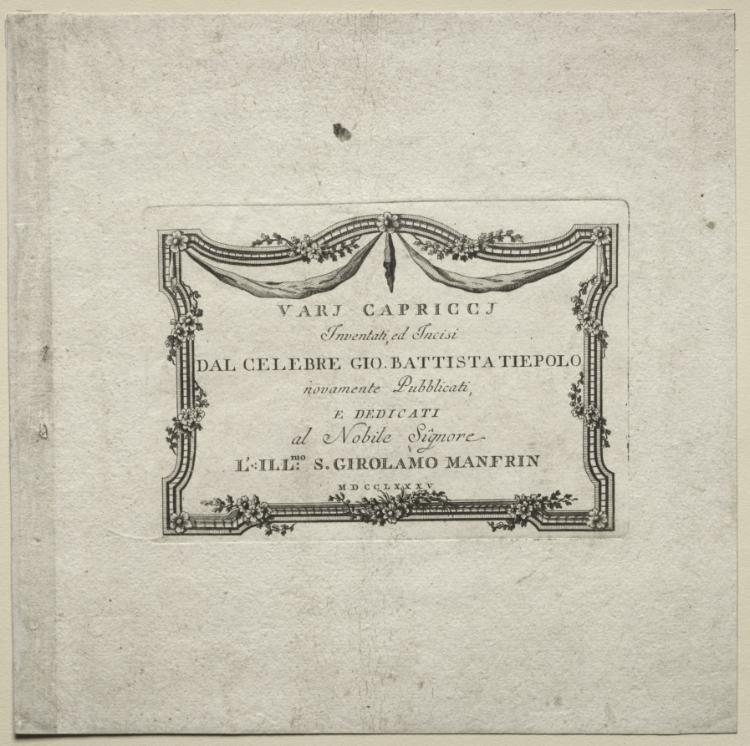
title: Various Caprices: Title Page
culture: Italy, 18th century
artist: Giovanni Battista Tiepolo (Italian, 1696–1770)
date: 1785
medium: etching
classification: Print